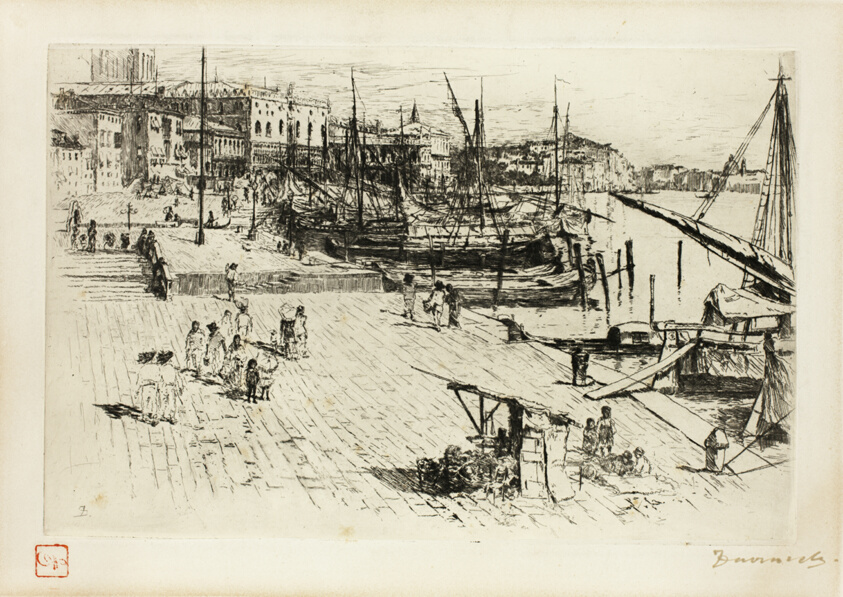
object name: Print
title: The Riva, Looking Towards the Grand Ducal Palace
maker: Frank Duveneck (American, 1848-1919)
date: 1880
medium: Etching, with drypoint, in black on cream wove paper, laid down on ivory wove paper (chine collé)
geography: United States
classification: etching; print; prints and drawing